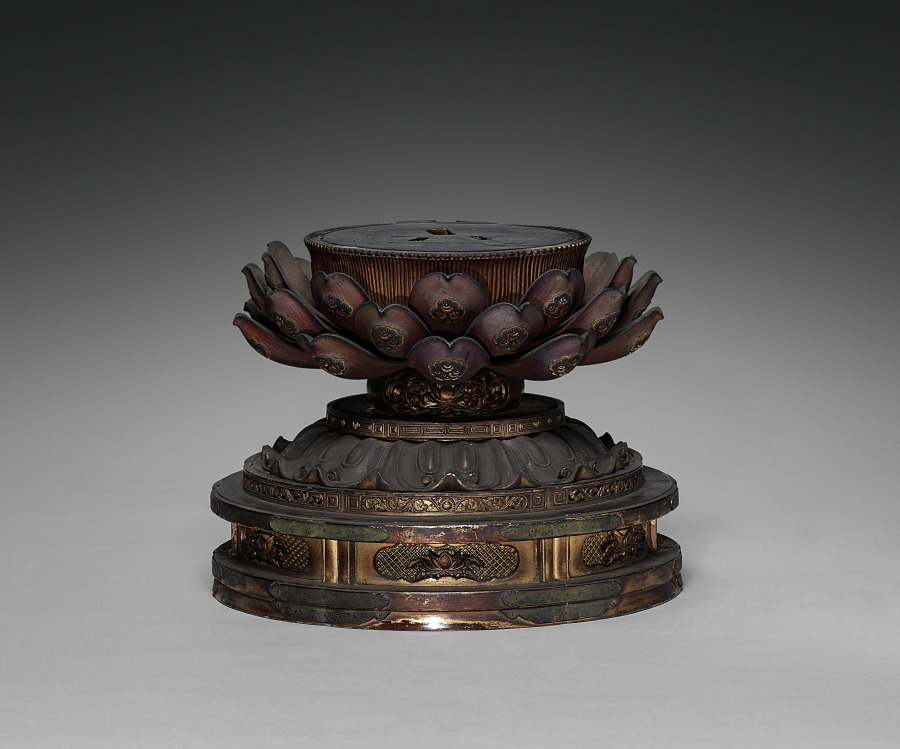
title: Batō (Horse-Headed) Kannon (base)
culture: Japan, Edo period (1615–1868)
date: 1600s–1700s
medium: wood with lacquer, color, and gold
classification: Sculpture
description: Batō Kannon, or Hayagriva Avalokiteshvara in Sanskrit, is the “horse-headed” form of the bodhisattva of compassion, who presides over the realm of animals in the Buddhist Six Realms of Transmigration (rebirth). A horse’s head appears in the hair of this sculpture to identify it. Bodhisattvas are beings who, though enlightened, choose to remain within the worlds of existence to help others. The six realms are heaven, hell, human, animal, hungry ghost, and ashura, or fierce supernatural entities.